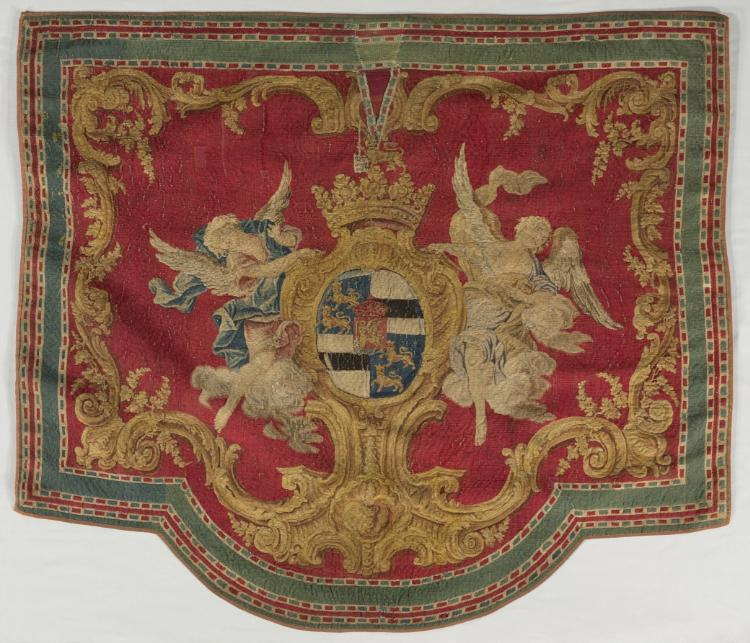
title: Heraldic Tapestry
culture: France, 18th century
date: 1700s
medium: tapestry weave: silk and wool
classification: Tapestry